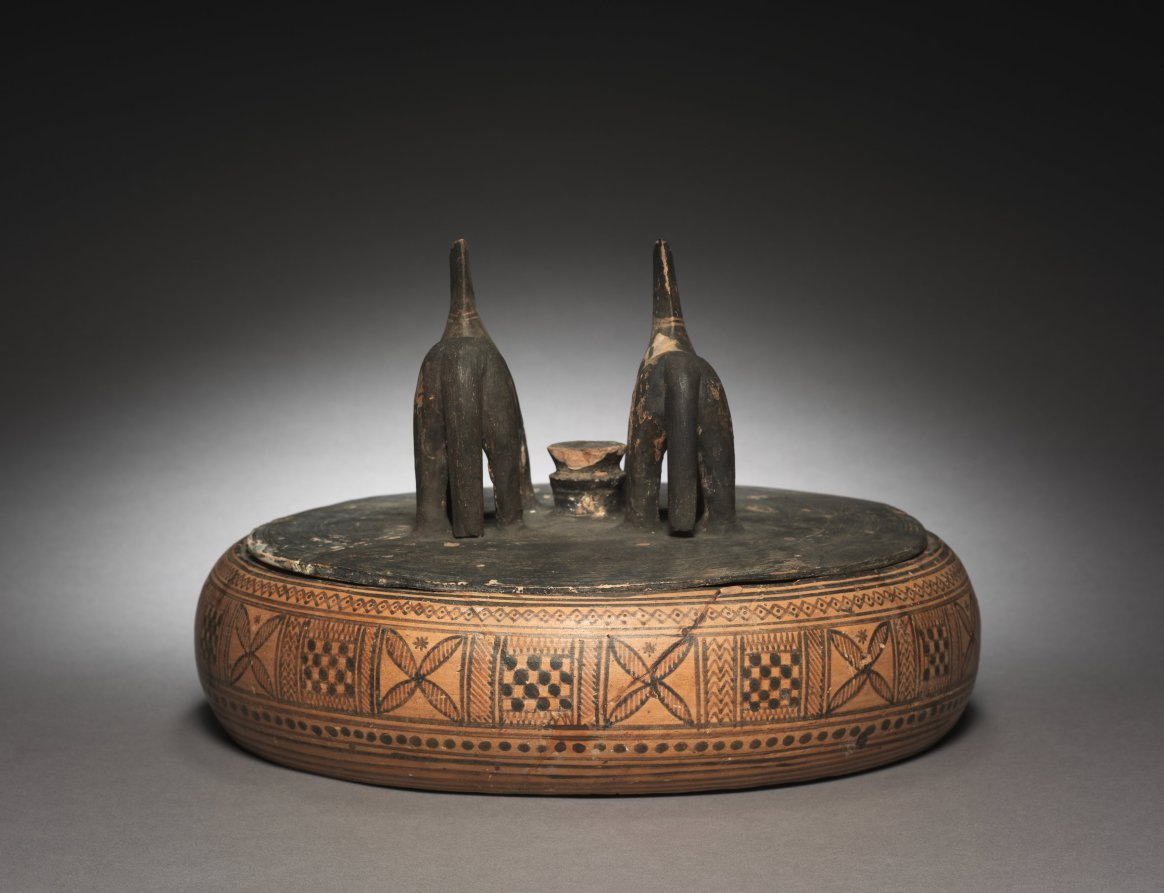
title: Geometric Horse Pyxis (Cylindrical Lidded Box)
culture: Greek, Attic, Late Geometric la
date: c. 760–750 BCE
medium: ceramic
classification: Ceramic